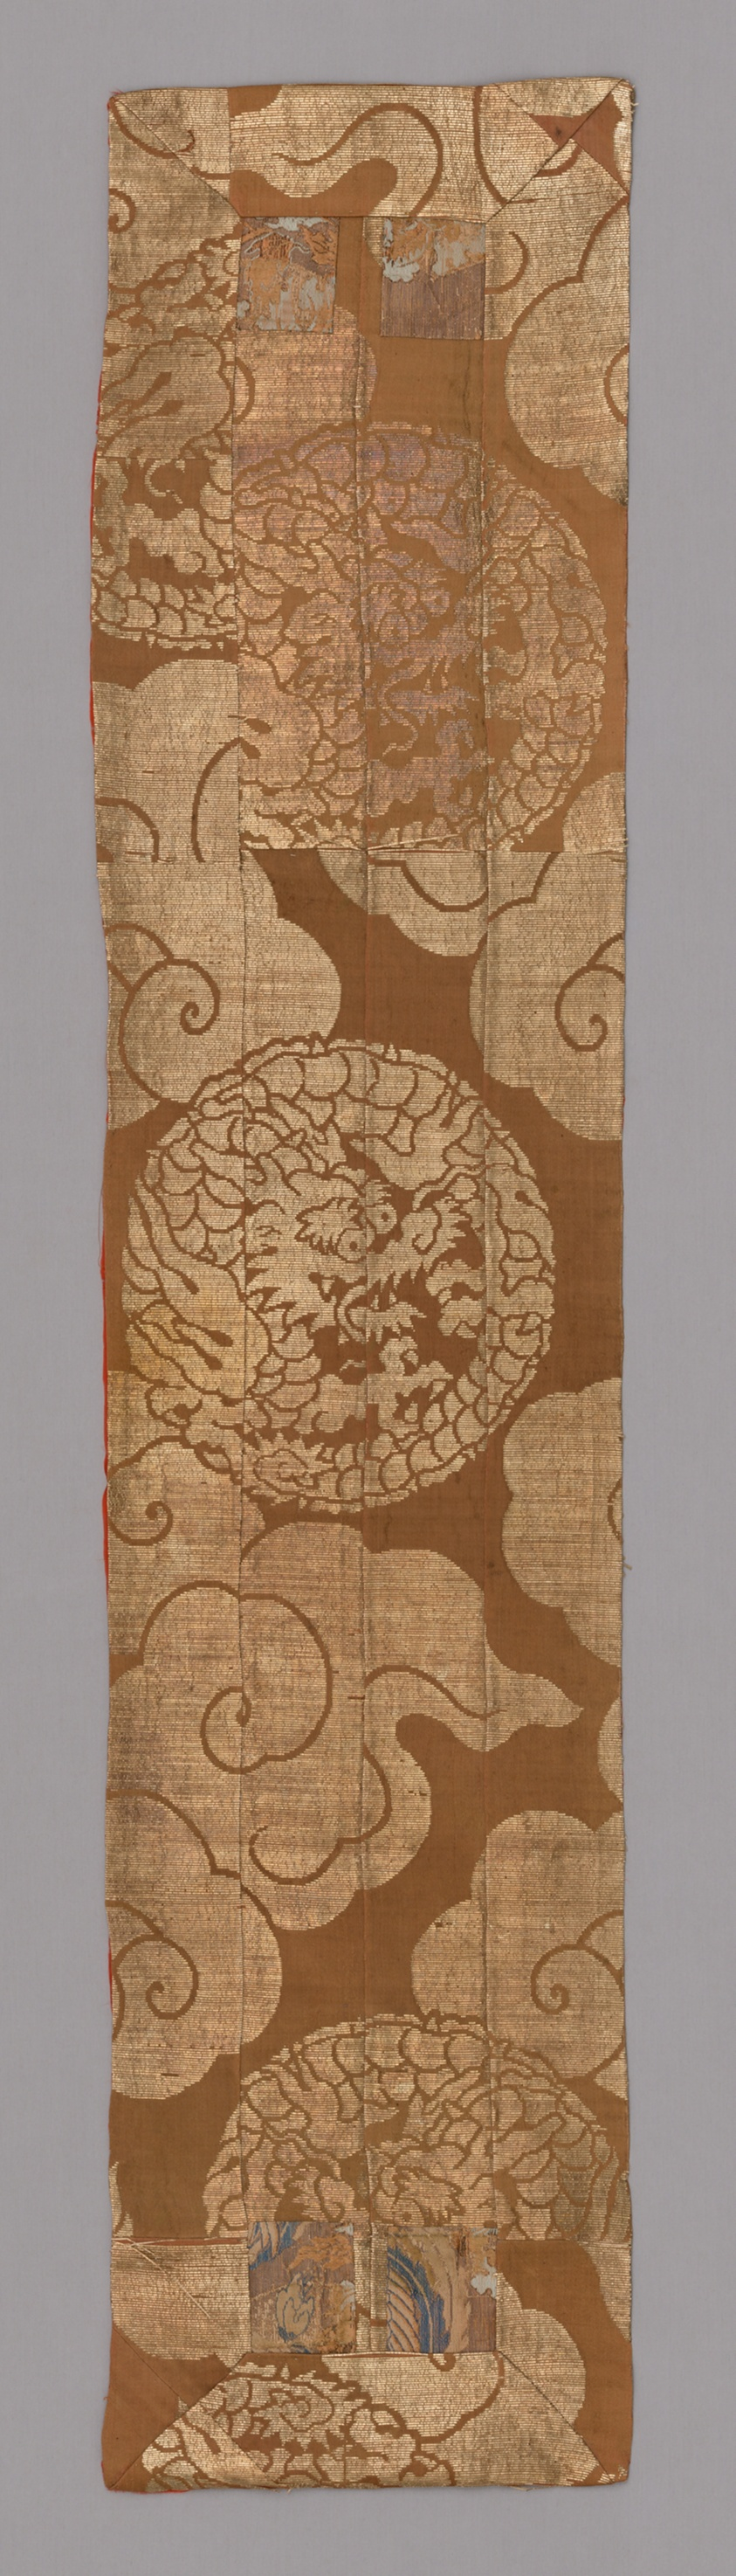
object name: Textile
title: Ôhi (Stole)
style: Japanism, meiji, late edo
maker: Japan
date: late Edo period (1789–1868)/Meiji period (1868–1912), 1800/90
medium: Heri, jô: silk, gold-leaf-on-lacquered-paper-strip, warp-float faced 3:1 'Z’ twill weave with plain interlacings of secondary binding warps and supplementary patterning wefts; shiten: silk and gold-leaf-over-lacquered-paper-strip, warp-float faced 4:1 satin weave with weft-float faced 1:2 'Z’ twill interlacings of secondary binding warps and supplementary patterning wefts; lining: silk, plain weave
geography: Japan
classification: textile; weaving; liturgical - buddhist